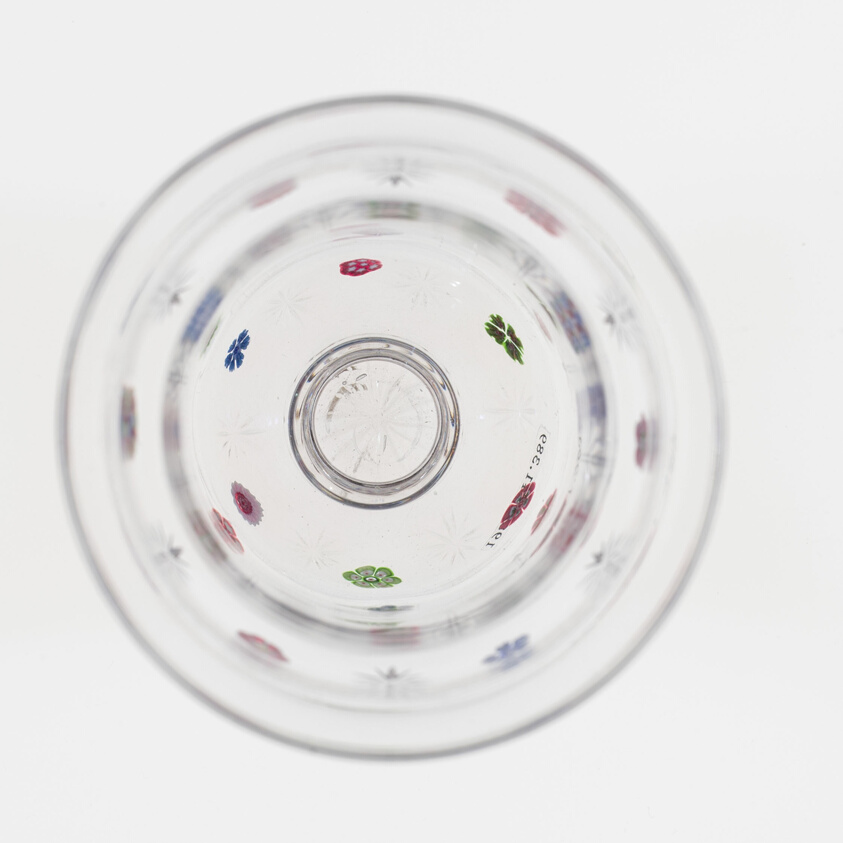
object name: Glass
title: Cordial Glass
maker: Baccarat Glassworks (Cristalleries de Baccarat); Lorraine, France, founded 1764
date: c. 1845–60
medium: Glass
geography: Baccarat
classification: paperweight; glass